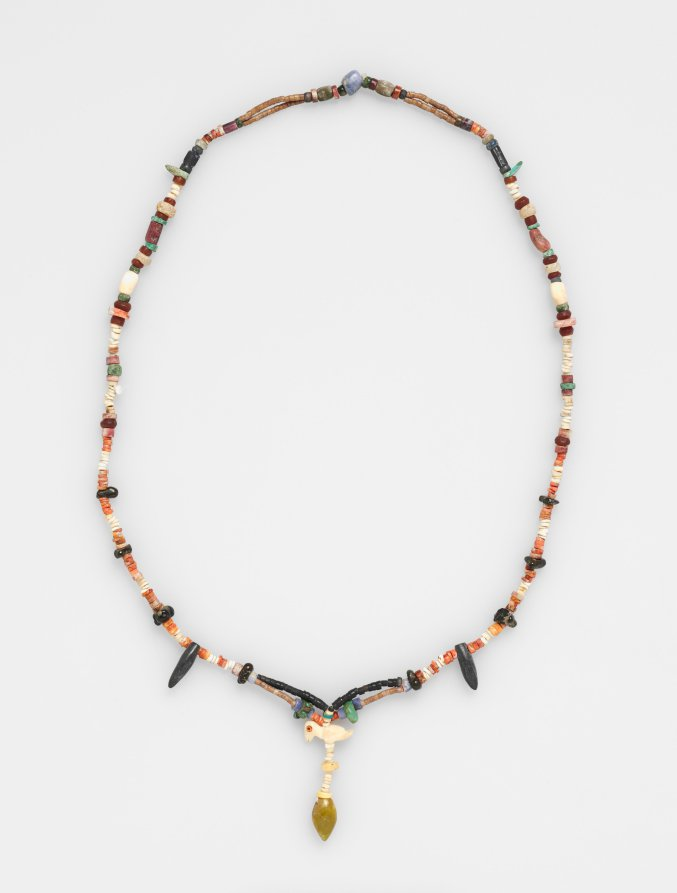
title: Necklace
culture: Peru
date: before 1532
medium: bone and beads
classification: Jewelry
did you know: These ancient beads were restrung in modern times.